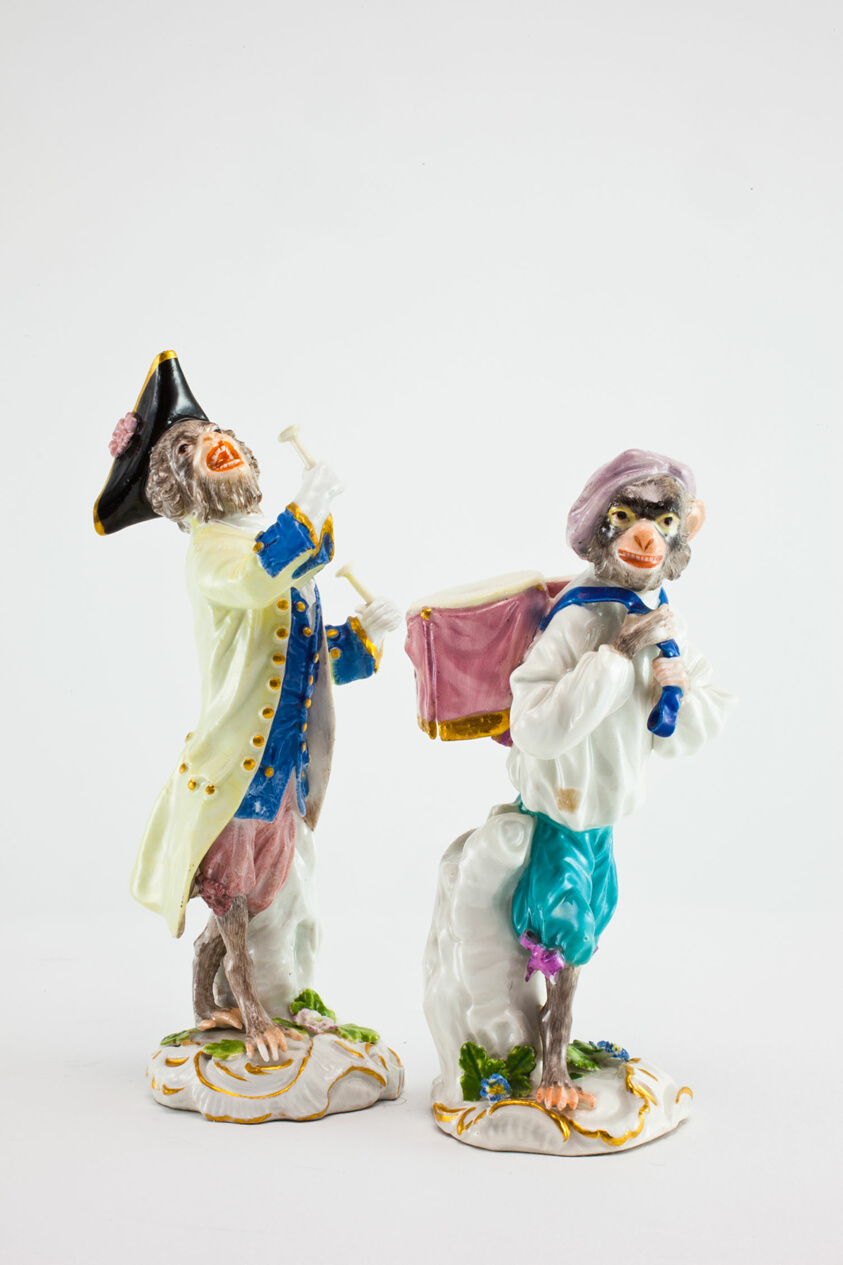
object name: Ceramics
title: Drum Beater for the Monkey Band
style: Rococo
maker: Meissen Porcelain Manufactory; German, founded 1710; After a model of Kändler or Reinicke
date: c. 1765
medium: Hard-paste porcelain, polychrome enamels, and gilding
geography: Meissen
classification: sculpture; ceramics; porcelain; european decorative arts